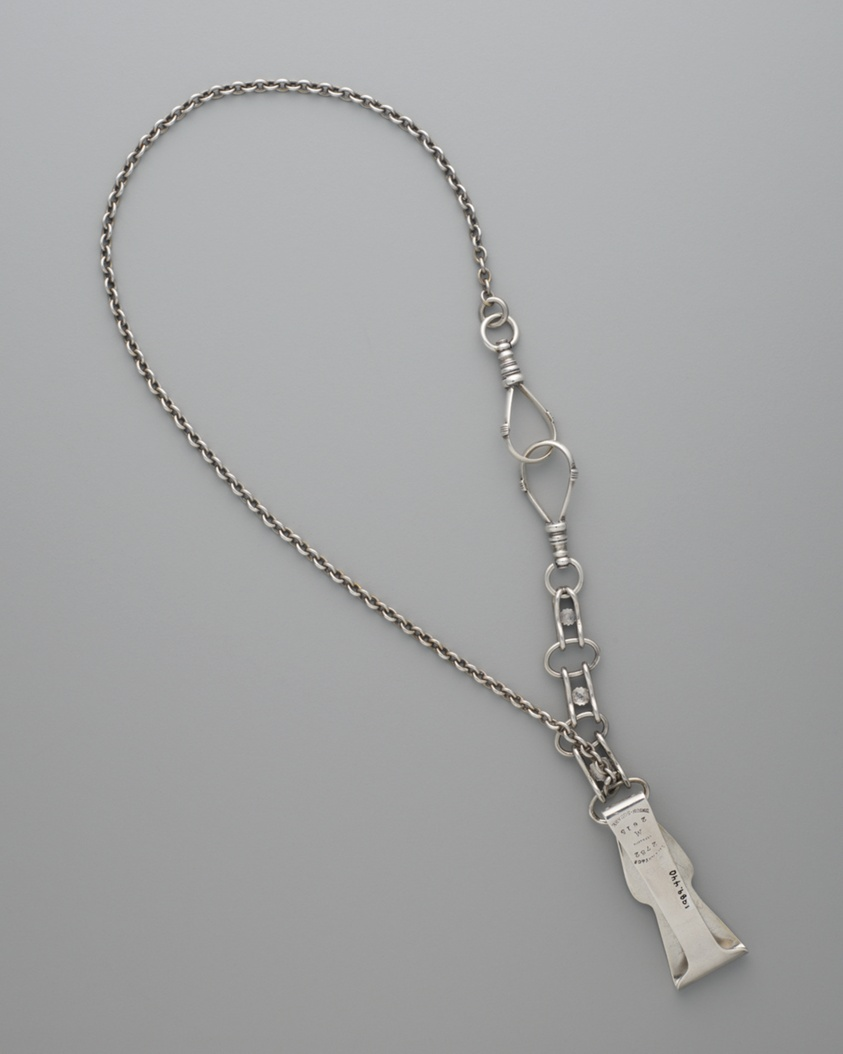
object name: Costume and Accessories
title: Chatelaine Hook and Chain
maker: Tiffany and Company (American, founded 1837); New York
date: 1870–74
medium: Silver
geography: New York City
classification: costume accessory worn at waist or below; chatelaine; silver; american decorative arts; american arts; decorative arts